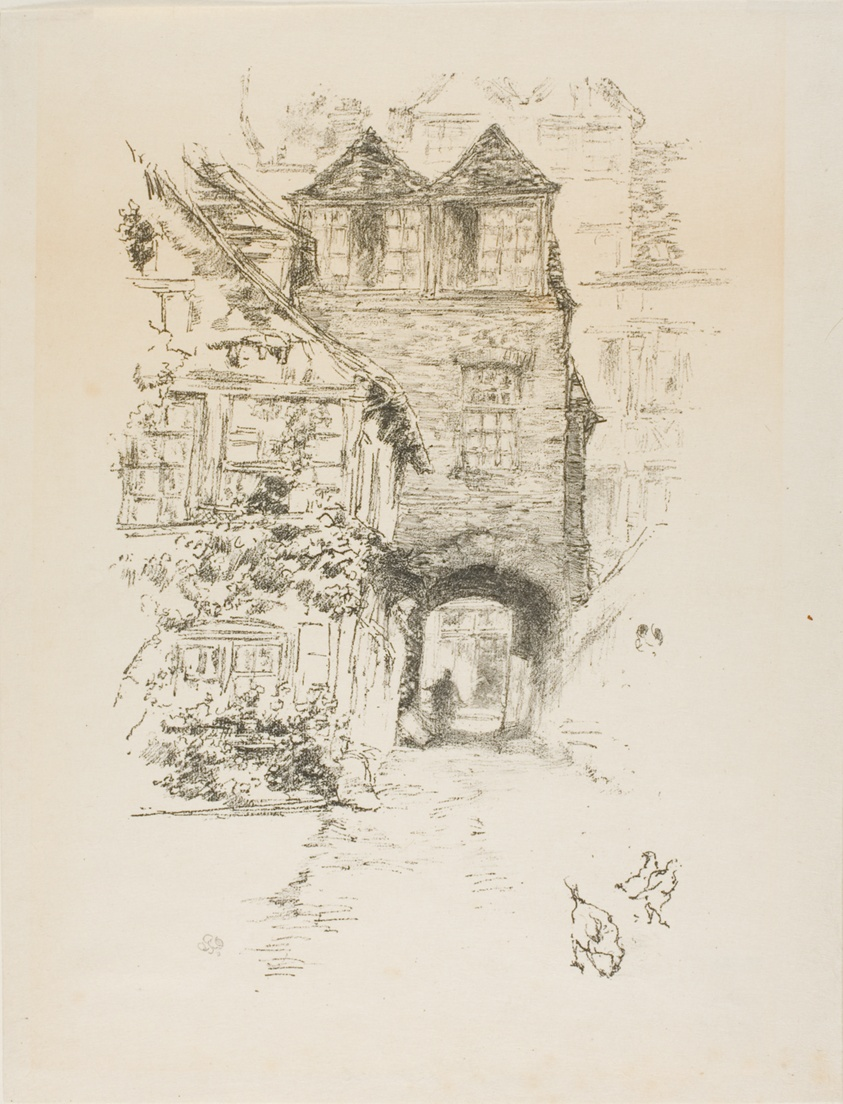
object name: Print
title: The Priest's House, Rouen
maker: James McNeill Whistler (American, 1834-1903)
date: 1894/95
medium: Transfer lithograph in black with stumping and scraping, on cream Japanese paper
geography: United States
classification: transfer lithograph; lithograph; print; prints and drawing; paper